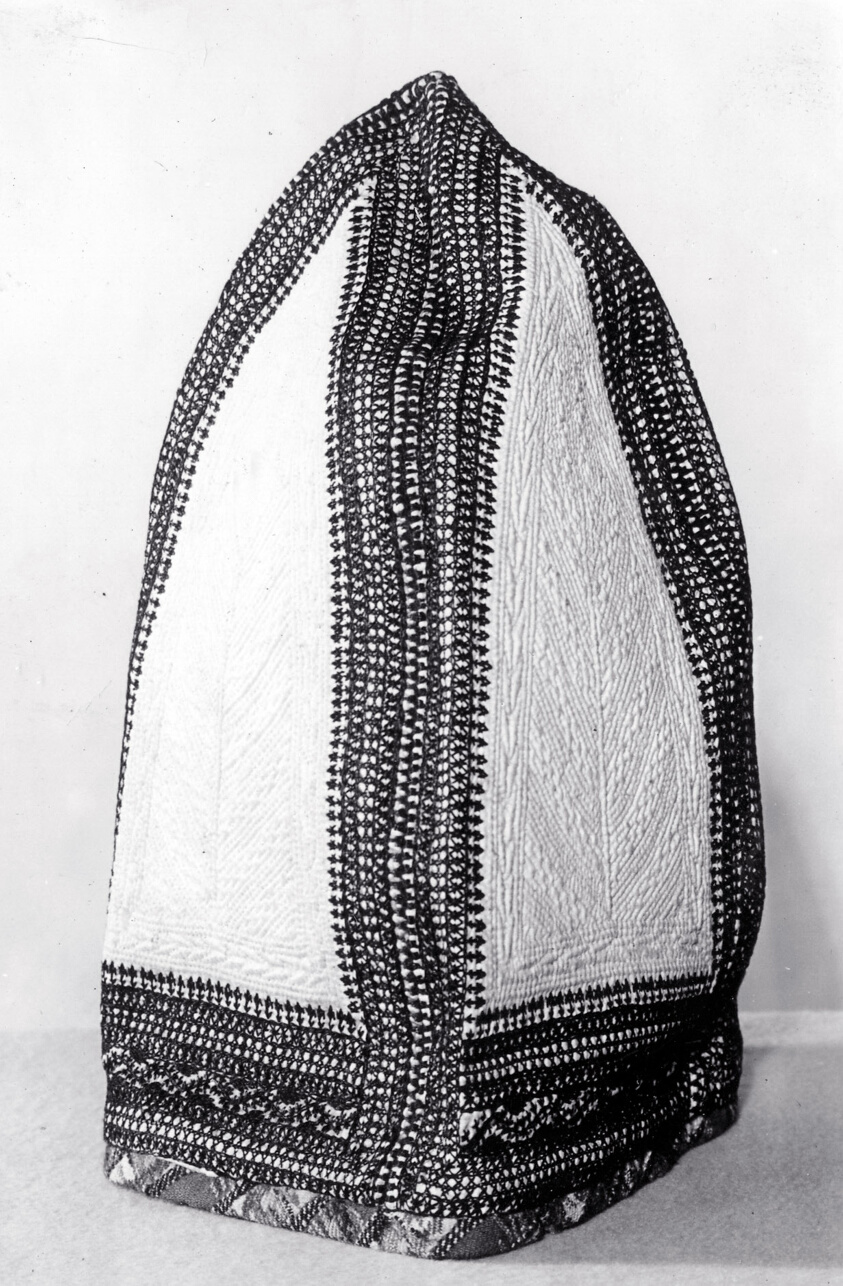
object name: Textile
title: Cap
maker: India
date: 19th century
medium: White cotton with quilted design and embroidered in black silk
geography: India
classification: textile; costume accessory - headdress; needlework (visual works); headdress - misc; costume; dress (garment); clothing